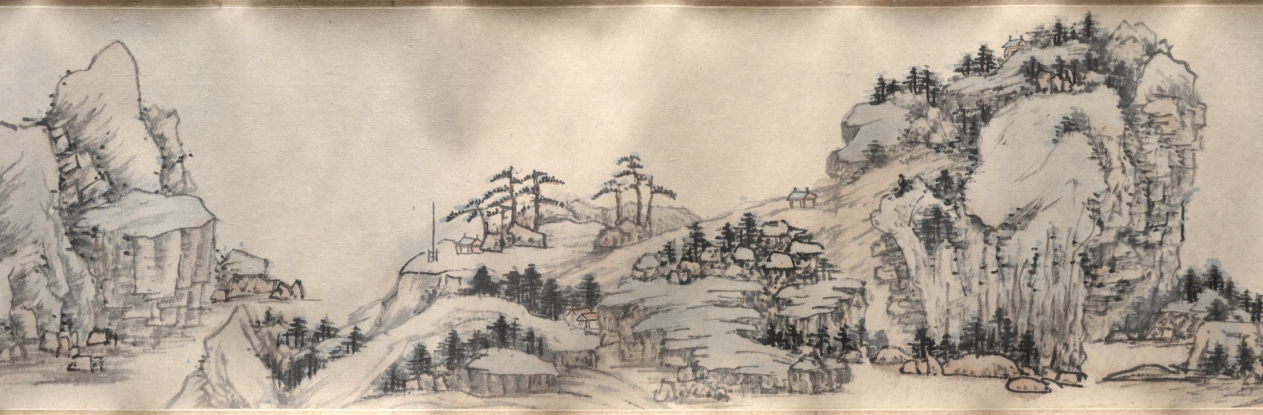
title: Dream Journey among Rivers and Mountains, no. 90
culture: China, Qing dynasty (1644-1911)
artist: Cheng Zhengkui (Chinese, 1604–1676)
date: 1658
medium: Handscroll; ink and color on paper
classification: Painting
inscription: 江山臥遊圖其九十, 青溪道人, 戊戌夏五。 [印] 程正揆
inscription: Title and inscription by Huang Yi 黃易 (1744–1802), and 3 seals.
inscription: 1 colophon and 9 additional seals: 3 seals of Dai Zhi 戴植 (active about 1821–1850); 1 colophon, dated 1914, and 3 seals of Yan Shiqing 顏世清 (1873–1929); 3 seals of Wang Nanping 王南屏 (1924–1985).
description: Cliffs and waterfalls interspersed with trees and dotted vegetation are spread over this handscroll. Long paths wind their way through villages, beside cottages, shrines, and over bridges. In the past, Chinese literati officials liked to take a “dream journey” along mountains and rivers when viewing landscape paintings in their studios. Scenery of this kind thus became a way to escape from the world of bureaucracy and administration. The painter Cheng Zhengkui used the title “Dream Journey” for a whole series of paintings, of which this is number 90. He is said to have painted 500 of them, but the actual count remains unknown.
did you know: Cheng Zhengkui planned to make 100 dream journey paintings but may have ultimately made 500.